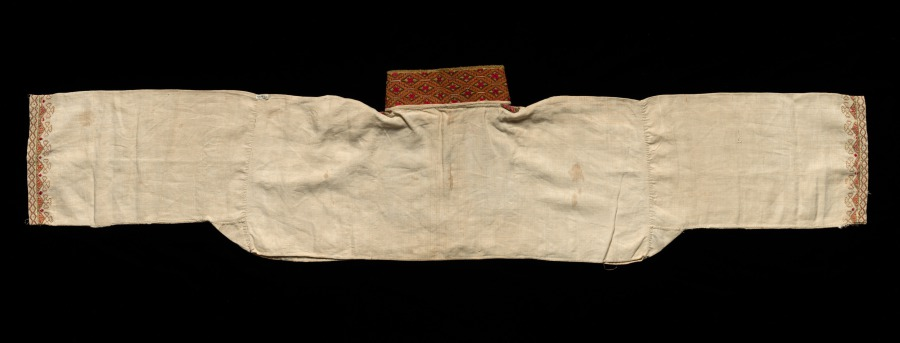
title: Peasant Blouse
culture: Norway, Hardanger, 19th century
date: 19th century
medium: plain weave linen? with embroidery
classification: Garment